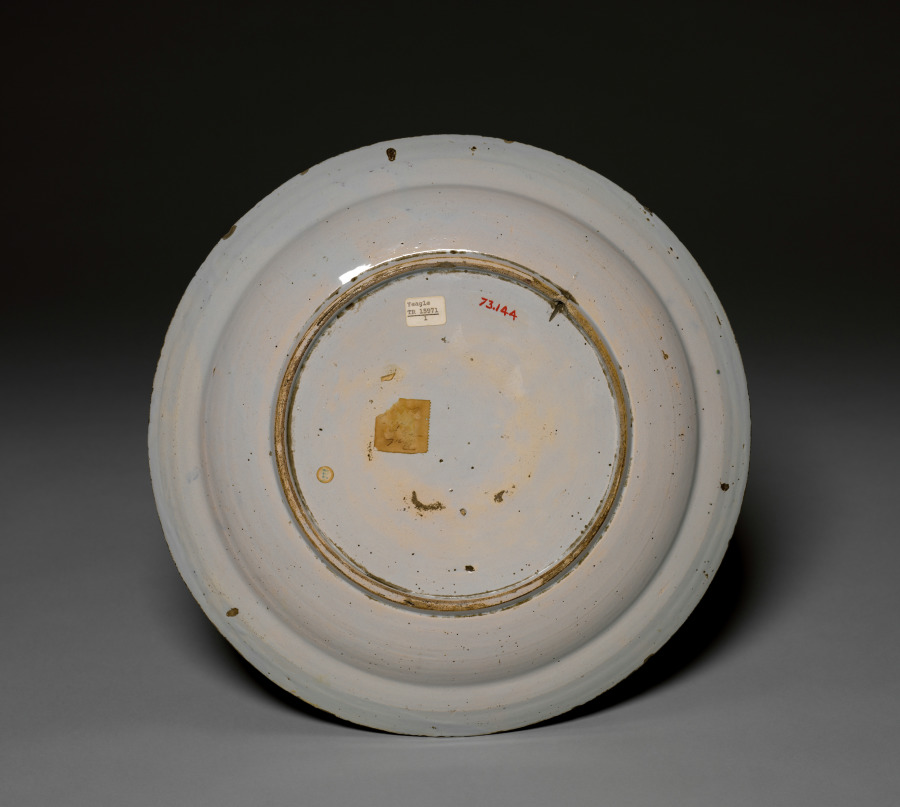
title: Polychrome Charger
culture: Netherlands, Holland, Delft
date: 1700s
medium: tin-glazed earthenware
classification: Ceramic